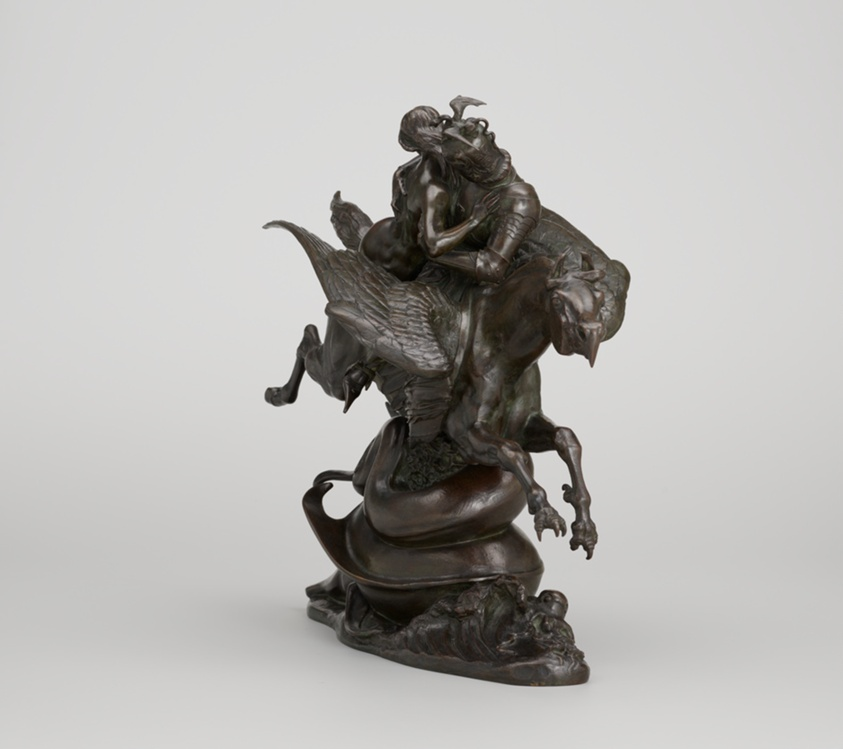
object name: Sculpture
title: Roger and Angelica Mounted on the Hippogriff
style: nineteenth century, 19th century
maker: Antoine Louis Barye (French, 1795–1875)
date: Modeled c. 1840, cast c. 1884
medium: Bronze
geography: France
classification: statuette; french; sculpture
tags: mythical, woman, royalty, royal, poetry, man, knights, fantastic beasts, animals